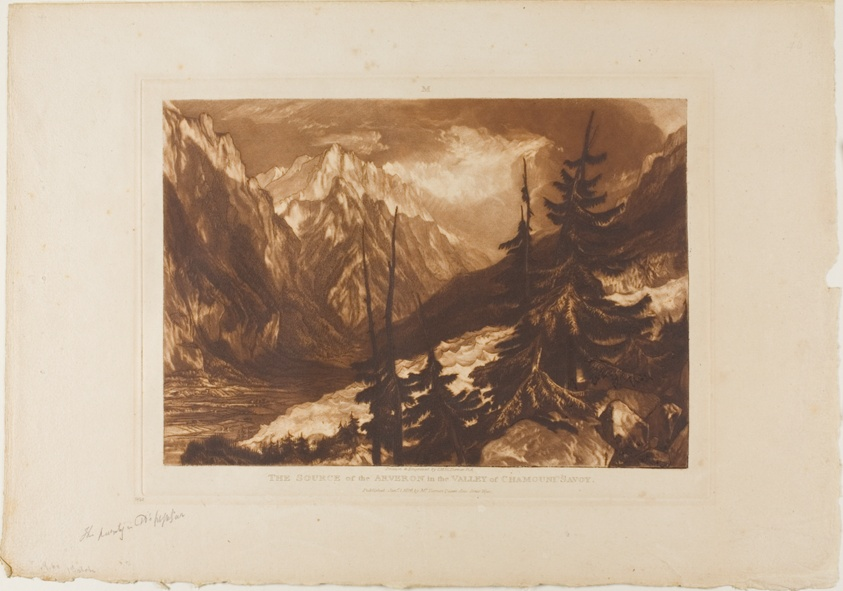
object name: Print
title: The Source of the Arveron, plate 60 from Liber Studiorum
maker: Joseph Mallord William Turner (English, 1775-1851)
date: published January 1, 1816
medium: Etching and engraving in brown on ivory paper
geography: England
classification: mezzotint; print; prints and drawing